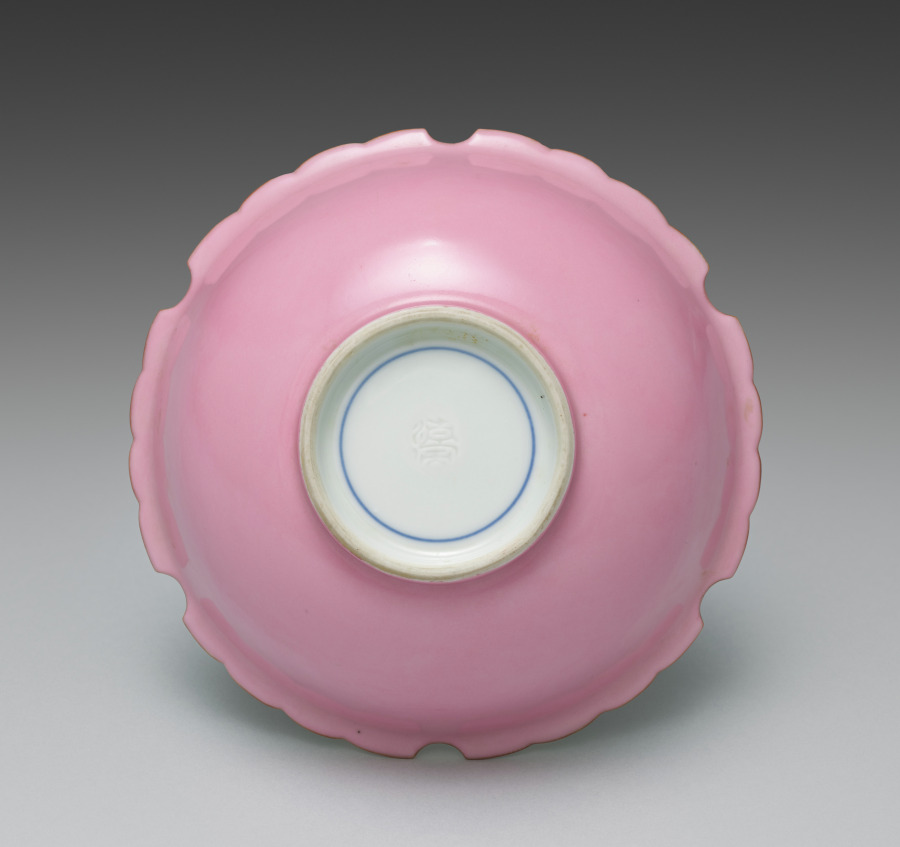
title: Dish from Snow-Flake Side Dishes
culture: Japan, Meiji period (1868–1912)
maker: Seifū Yohei III (Japanese, 1851–1914)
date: 1893–1914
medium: One from a set of six porcelain dishes; porcelain with lobed rims and pink glaze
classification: Ceramic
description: According to the box lid, this set of six side dishes, or mukōzuke, are “snow-flower style” (sekkashiki), having mouths shaped like snowflakes. Their mouths, which have six lobes and scalloped edges, are traced with brown iron oxide at the rim. The outside of each bowl is glazed with a very bright pink over the basin and foot, and the inside is left white. From directly above, one sees a snowflake-like shape, and from the side, they seem to float above a rosy ground.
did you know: The box for this set of dishes has an inscription on the side noting that they were for a person with the family name Nakamoto.